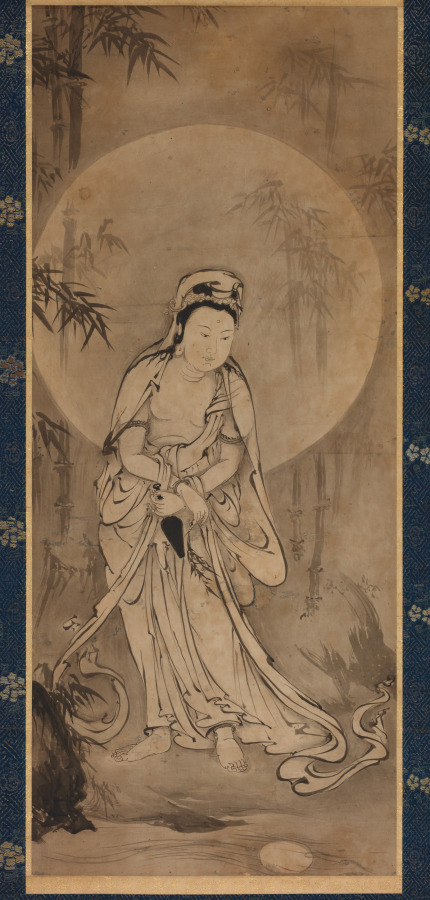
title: Willow-and-Moon Kannon (Yōryū Kannon)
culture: Japan, Muromachi period (1392–1573)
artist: attributed to Gakuō Zōkyū (Japanese, active about 1482–1514)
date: c. 1500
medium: Hanging scroll; ink on paper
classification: Painting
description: This painting of Kannon, a Buddhist deity of mercy and compassion with many forms. is attributed to Gakuō Zōkyū, a well-known Zen monk who specialized in ink painting. Kannon looks at the moon reflected in the water, a symbol of impermanence, and holds a willow branch and water vase symbolizing healing and purification.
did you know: Kannon is a bodhisattva—a being capable of enlightenment, but who delays it in order to help other beings.